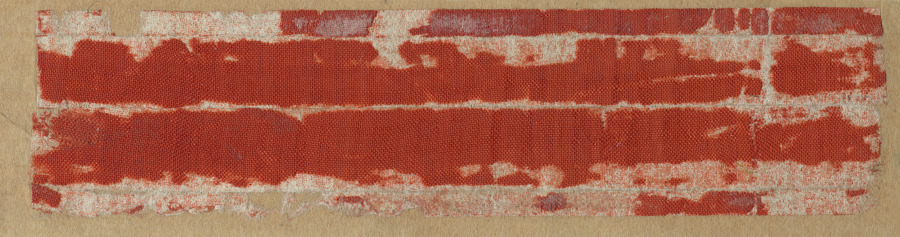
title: Fragment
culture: China or Japan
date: 700s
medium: silk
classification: Textile